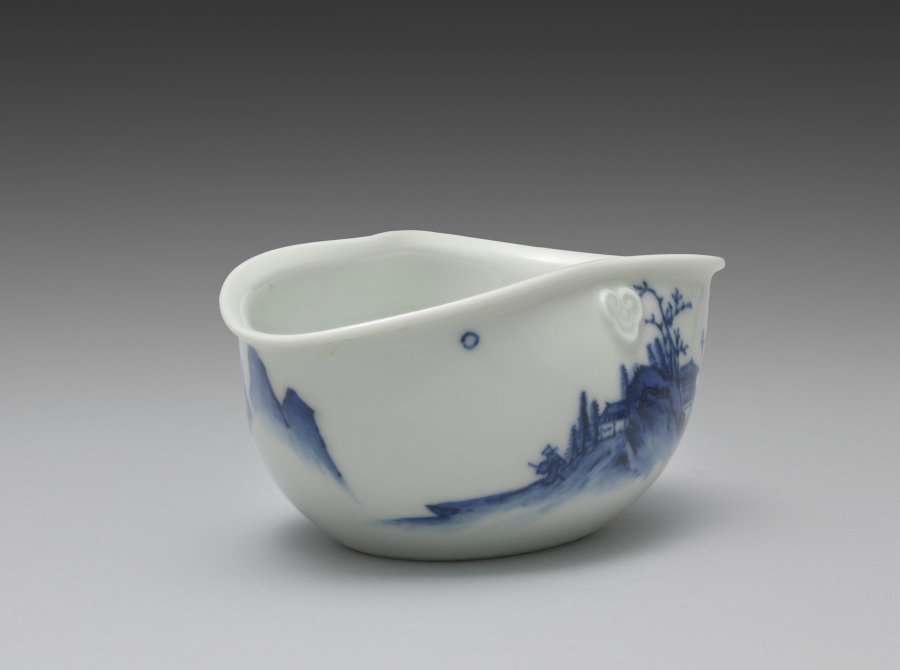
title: Water Cooler from Tea Set with Chinese Landscape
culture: Japan, Meiji period (1868–1912)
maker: Seifū Yohei III (Japanese, 1851–1914)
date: 1893–1914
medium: Porcelain with underglaze blue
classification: Ceramic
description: The kidney-shaped water cooler, yuzamashi, has a scene of a man gazing at a full moon in a dramatic mountain-scape stretching before a large compound in the woods. Another man, hunched over and carrying a heavy parcel tied to a pole over his shoulder, struggles to make his way up a hill to the site. The cooler also has a pair of applied nyoi staff-head forms for resting the tips of one’s thumb and index finger.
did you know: This is a yuzamashi, a container used to cool boiled water to just the right temperature for the best flavor when steeping.